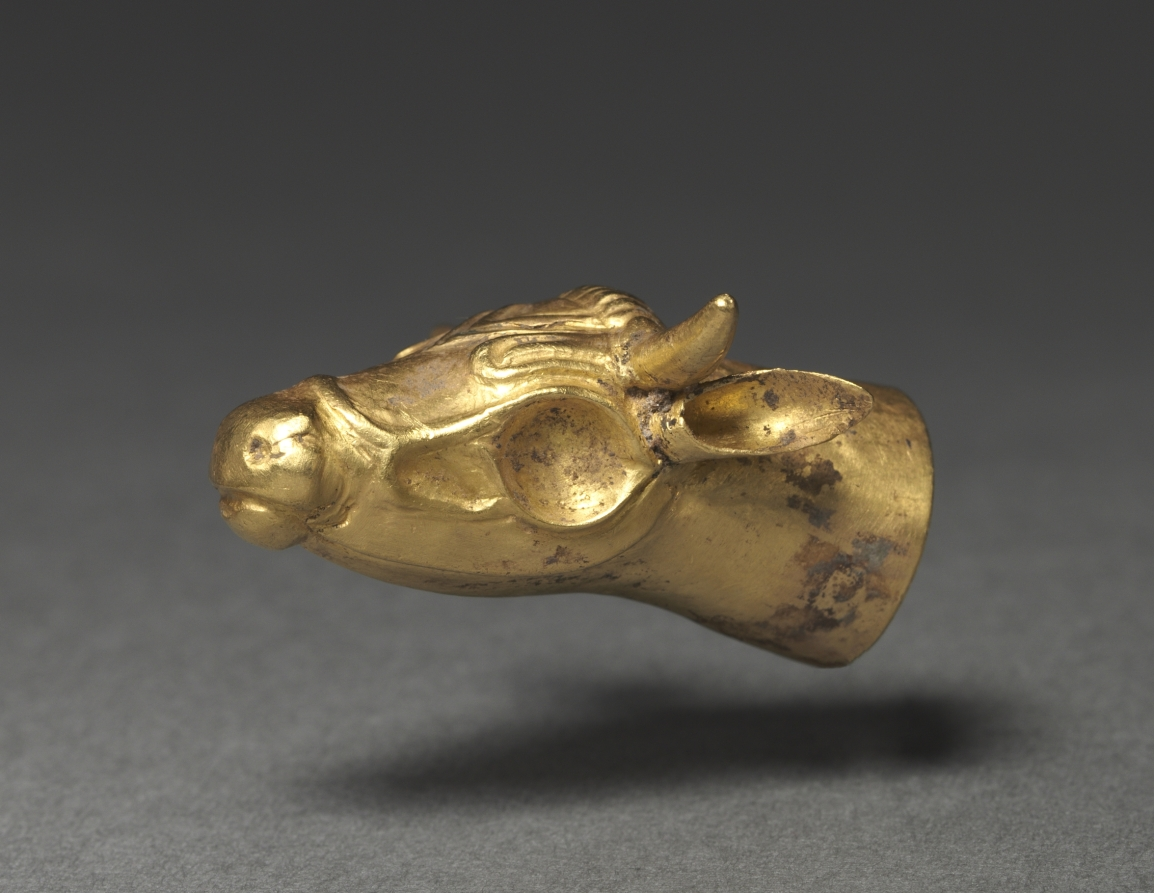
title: Bovine Finial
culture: Greece or Turkey, Thracian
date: 400–300 BCE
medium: gold, hammered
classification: Sculpture